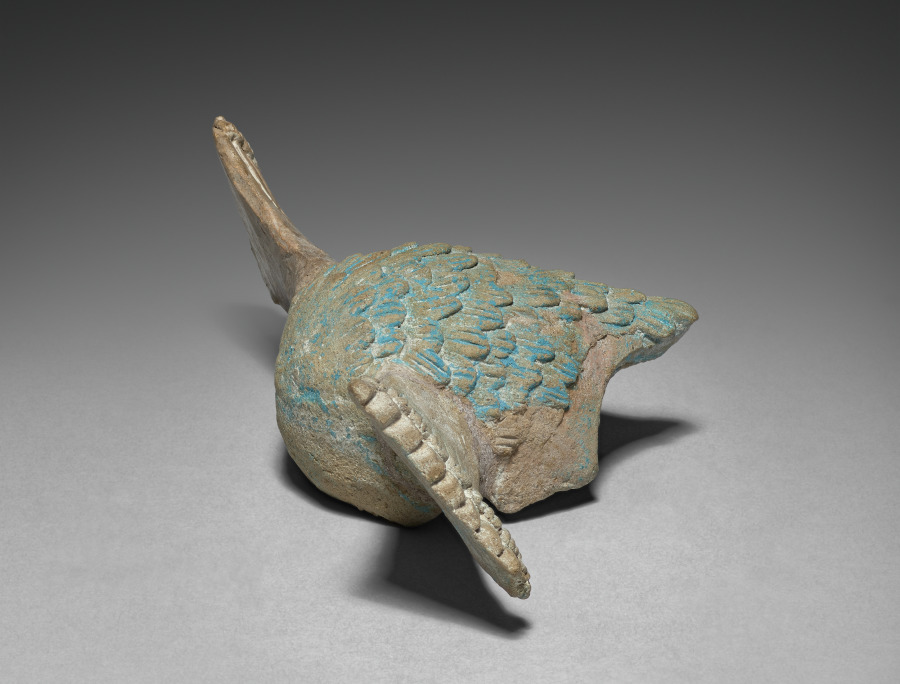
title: Warrior Figurine with Removable Headdress (headdress)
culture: Mexico, Yucatán, Jaina Island region, Campeche, Maya style (250-900)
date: 600–900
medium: earthenware with pigment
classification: Sculpture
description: The major offerings placed in the Maya graves of Jaina Island were ceramic figurines, some of Mesoamerica's finest, that depict deities and humans in a variety of roles. This removable headdress belongs to a warrior figure who once probably held weapons and wears either quilted cotton armor or the feathered uniform of a military order. We don't know why such figures are often pot-bellied.